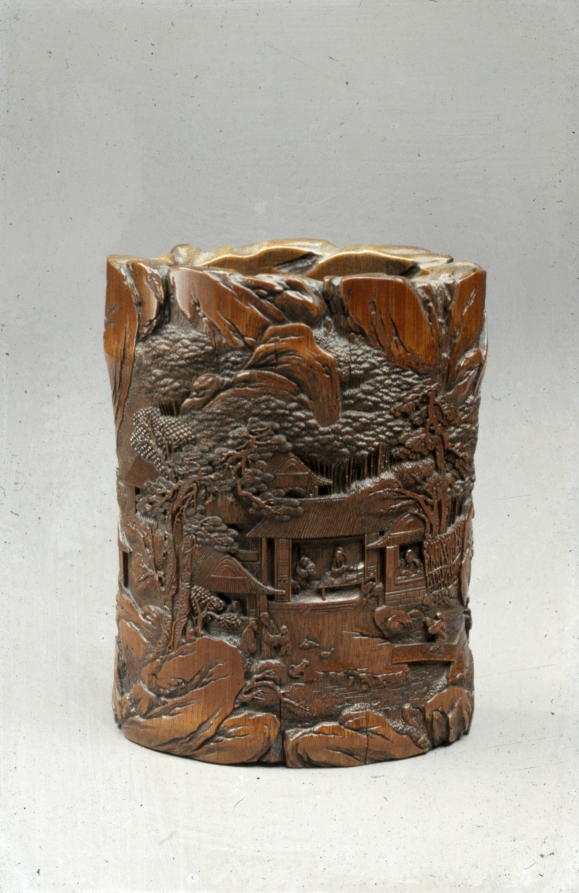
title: Brush Holder with Figures in Landscape and Poetic Inscription by Wang Meilin from Jiading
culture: China, Qing dynasty (1644-1911), Daoguang reign (1821-50)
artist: Wang Meilin (Chinese, active c. 1825)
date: 1800s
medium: carved bamboo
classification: Wood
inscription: A ten-acre [home], a five-acre yard with a water pool, and a thousand bamboos. Don’t say the field is narrow, or the location remote. It is enough to accommodate the knee and rest the shoulder. It has a hall and a yard, a bridge and a boat. It has books and wine, songs and string [instruments]. An old man in the midst of it, his white beard flowing. [He] is moderate and satisfied, has no demands and needs. Like a bird he chooses a branch, builds a nest, and rests at ease. Like a fish in a swamp, that does not know how wide the ocean is. . . . All I like, lies before me. I drink a cup of wine from time to time, recite a [poem], wife and children play, chicken and dogs are at leisure, and I will grow old here.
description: This bamboo brush holder shows a scholar inside a mountain retreat under trees. On its back side, a cliff inscribed with a text by the Tang poet Bai Juyi (772–846) describes the carefree life of a scholar among family and servants in the countryside. The text in cursive script style calligraphy (xingshu) says: A ten-acre [home], a five-acre yard with a water pool, and a thousand bamboos. Don’t say the field is narrow, or the location remote. It is enough to accommodate the knee and rest the shoulder. It has a hall and a yard, a bridge and a boat. It has books and wine, songs and string [instruments]. An old man in the midst of it, his white beard flowing. [He] is moderate and satisfied, has no demands and needs. Like a bird he chooses a branch, builds a nest, and rests at ease. Like a fish in a swamp, that does not know how wide the ocean is. . . . All I like, lies before me. I drink a cup of wine from time to time, recite a [poem], wife and children play, chicken and dogs are at leisure, and I will grow old here.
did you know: Bamboo was considered a humble material that suited the Confucian ideals of frugality and modesty.